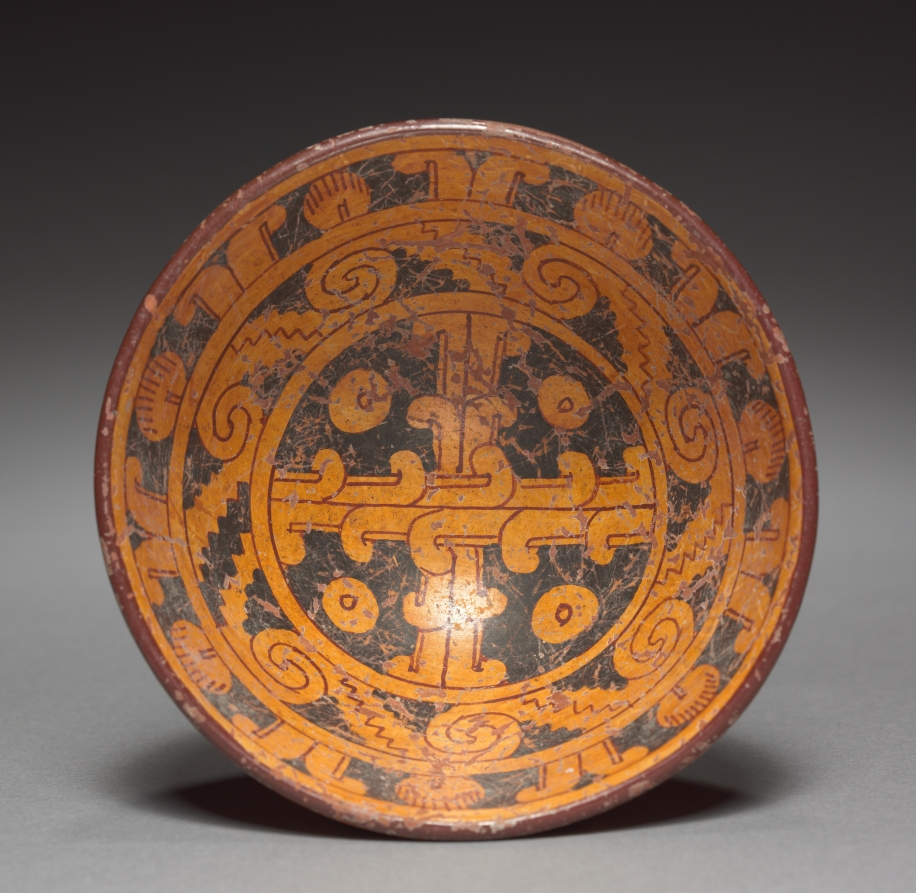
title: Bowl with Rattle Base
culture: Mexico, Cholula?, Mixteca-Puebla Style, 10th-16th century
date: c. 900–1519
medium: earthenware with colored slips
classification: Ceramic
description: The nobility may have used these goblets for a chocolate beverage or for pulque, made from the fermented sap of the maguey cactus. Both are painted with the precision and brilliant colors for which the Mixteca-Puebla style is renowned, and they carry some of the same motifs, such as the band of stylized animal heads at the top. The smaller bowl has a rattle base.